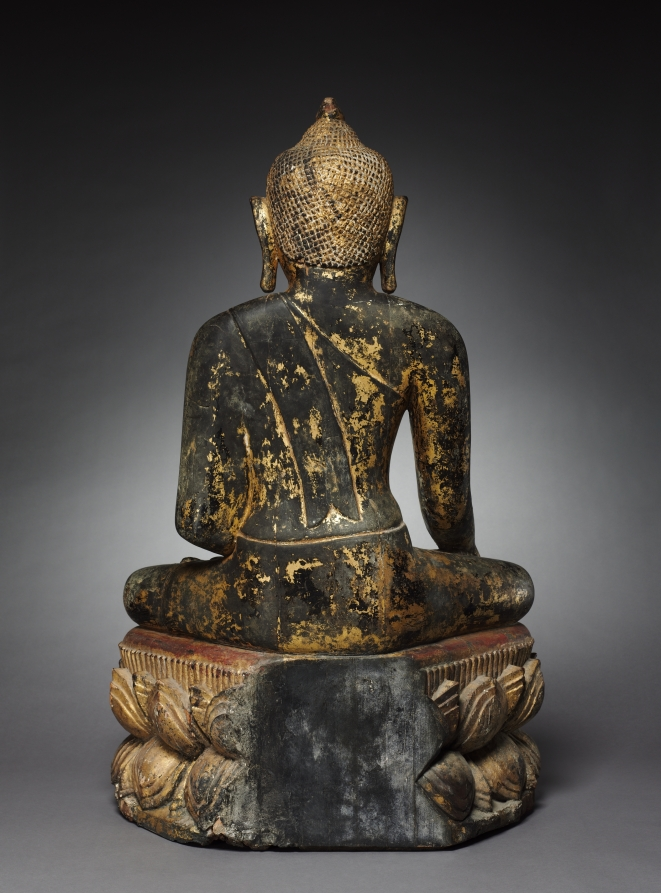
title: Seated Buddha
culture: Burma (Myanmar)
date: 1100s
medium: Gilt lacquer on solid wood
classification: Lacquer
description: This rare image of the historical Buddha Shakyamuni is shown seated with crossed legs in the position of meditation. His left hand rests on his lap, referring to his meditation under the Bodhi tree, and his right hand is in the earth-touching gesture—calling the earth to witness his enlightenment. The Buddha sits on a double lotus pedestal that indicates the presence of a transcendent being. The sculptural style is typical of sculptures made at the Buddhist site of Pagan. Sculptures such as this were installed in niches in an interior passage of a temple. As is typical of Burmese works, this sculpture was carved from a solid piece of wood. Its surface was covered in black lacquer and then gilded; a great deal of the gilding remains intact. Because lacquer is an easily perishable material, works of this type and size are exceedingly rare; this sculpture is one of the best extant examples.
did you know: The parallel lines with heart-shaped ends near the Buddha's ankles are the rippling pleats of his garment's hem.